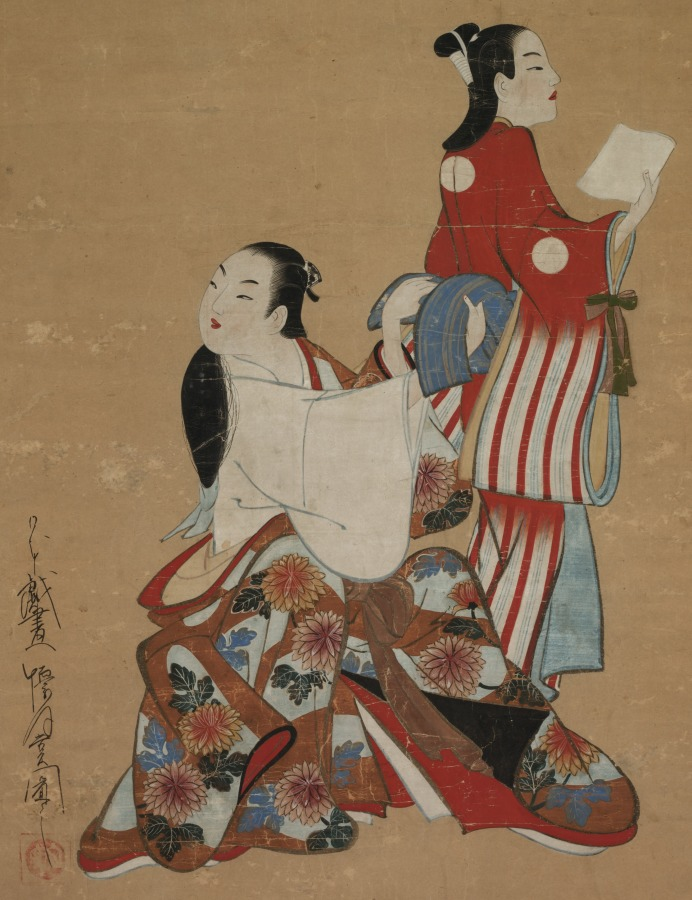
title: Courtesan and Attendant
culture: Japan, Edo period (1615–1868)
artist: after Kaigetsudō Ando (Japanese, c. 1671–1743)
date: c. 1730–1868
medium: hanging scroll: ink and color on paper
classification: Painting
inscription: signed: Nihon giga Kaigetsudō no zu